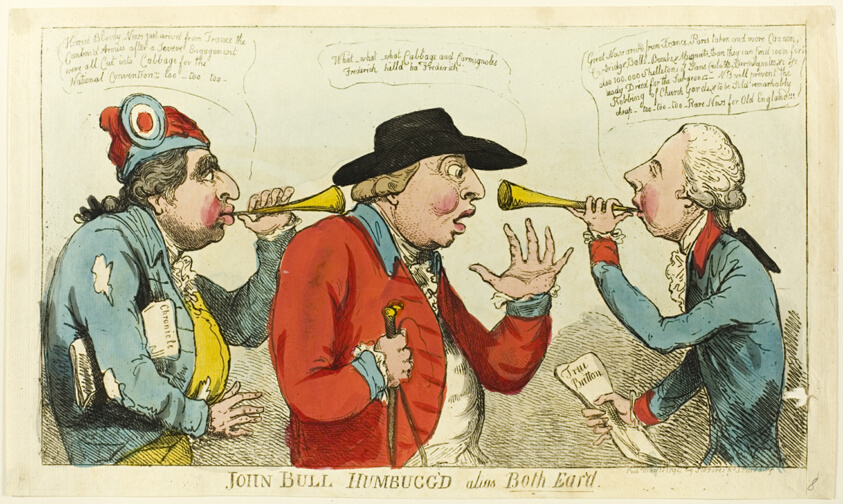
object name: Print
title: John Bull Humbugg'd Alias both Ear'd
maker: Isaac Cruikshank (English, 1764-1811); published by S.W. Fores (English, 1761-1838)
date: published May 12, 1794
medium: Hand-colored etching on ivory paper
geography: England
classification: etching; print; prints and drawing